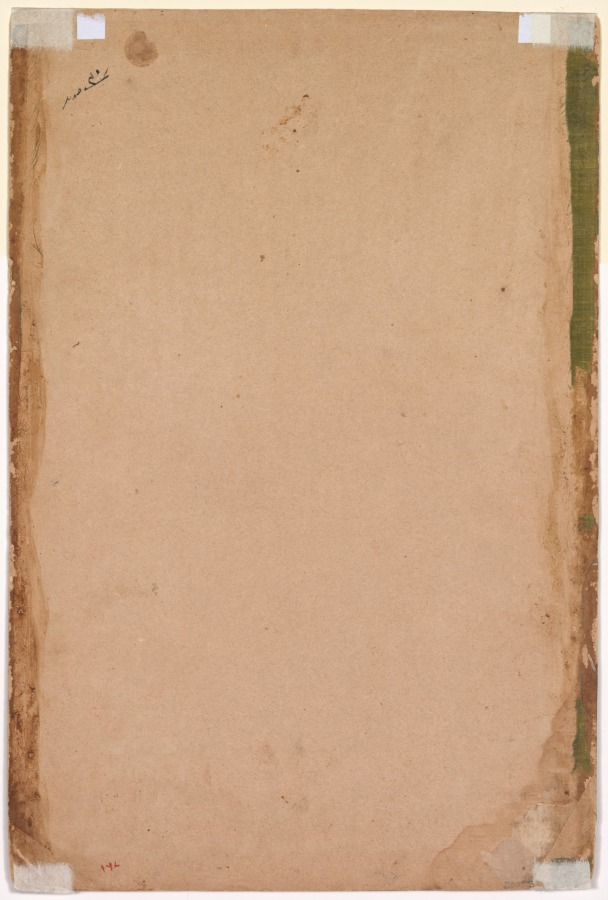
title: The game of wolf-running in Tabriz, from an Akbar-nama (Book of Akbar)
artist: Banavari 1 (Indian, active 1550s-1590s)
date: c. 1595–1600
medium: Gum tempera, ink, and gold on paper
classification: Painting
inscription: signed by Banwari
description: After four years of traveling in exile, fleeing Afghan forces, Humayun reached Tabriz, the glittering capital of the Safavid dynasty in northwestern Iran, here imaginatively rendered by the Indian artist. There the second Mughal emperor enjoyed warm hospitality extended by the shah of Iran, who called for a game of wolf-running for which the city was famous. Artists painting during the time of Akbar, late in his reign when historical subjects dominated, speculated as to how the game was played, based on eyewitness accounts. They gave the figures lively emotive expressions and gestures, and the dense crowding successfully conveys the pandemonium of the scene.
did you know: During extreme activities, turbans could come unwound and fall off.